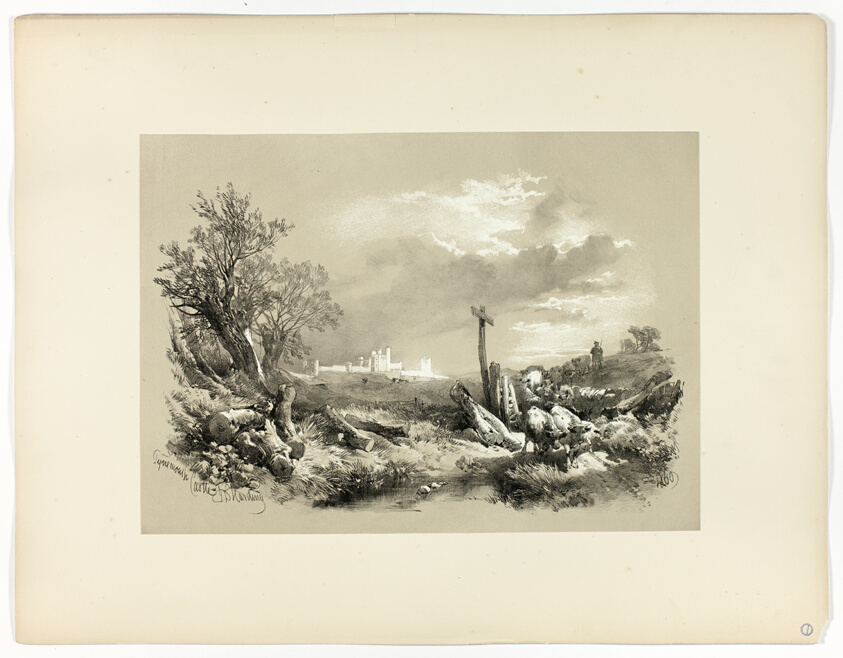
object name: Print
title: Tynemouth Castle, from Picturesque Selections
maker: James Duffield Harding, (English, 1798-1863); Published by W. Kent and Co.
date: 1860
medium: Lithograph on paper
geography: England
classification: lithograph; print; prints and drawing